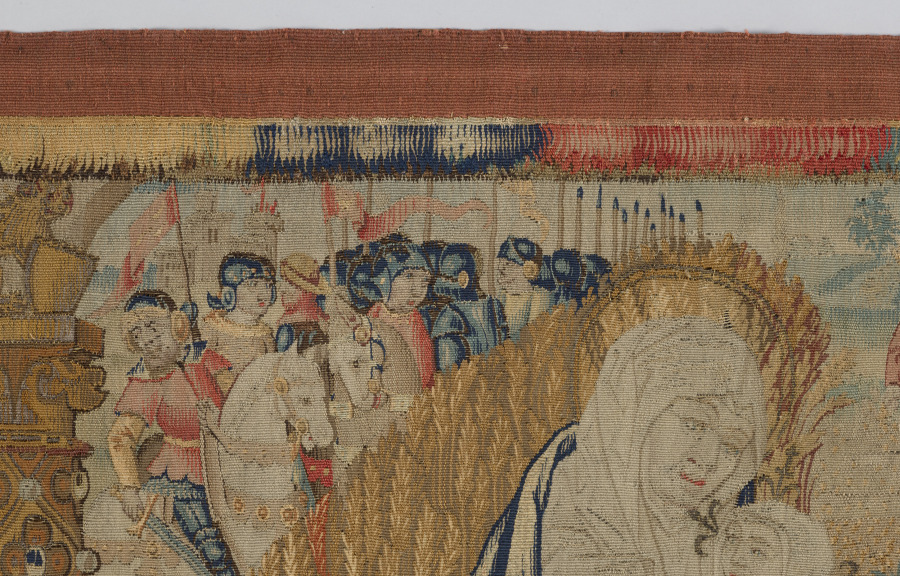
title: Altar Frontal: Scenes from the Childhood of Christ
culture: France and South Netherlands, 1500s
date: c. 1500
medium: Wool, silk, gold thread; tapestry weave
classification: Tapestry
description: Pictorial tapestries were symbols of wealth and more highly prized than paintings. Small tapestries with Christian imagery were frequently commissioned to embellish the fronts of altars. This example displays the Massacre of the Innocents, the Flight into Egypt, and Christ among the Doctors. Tapestry weave is ideal for creating narrative scenes. The technique can be compared to painting, as each colored weft (horizontal thread) is interlaced with warps (vertical thread) where needed for the pattern. As expensive investments, tapestries have the advantage of being portable and easily stored and displayed.